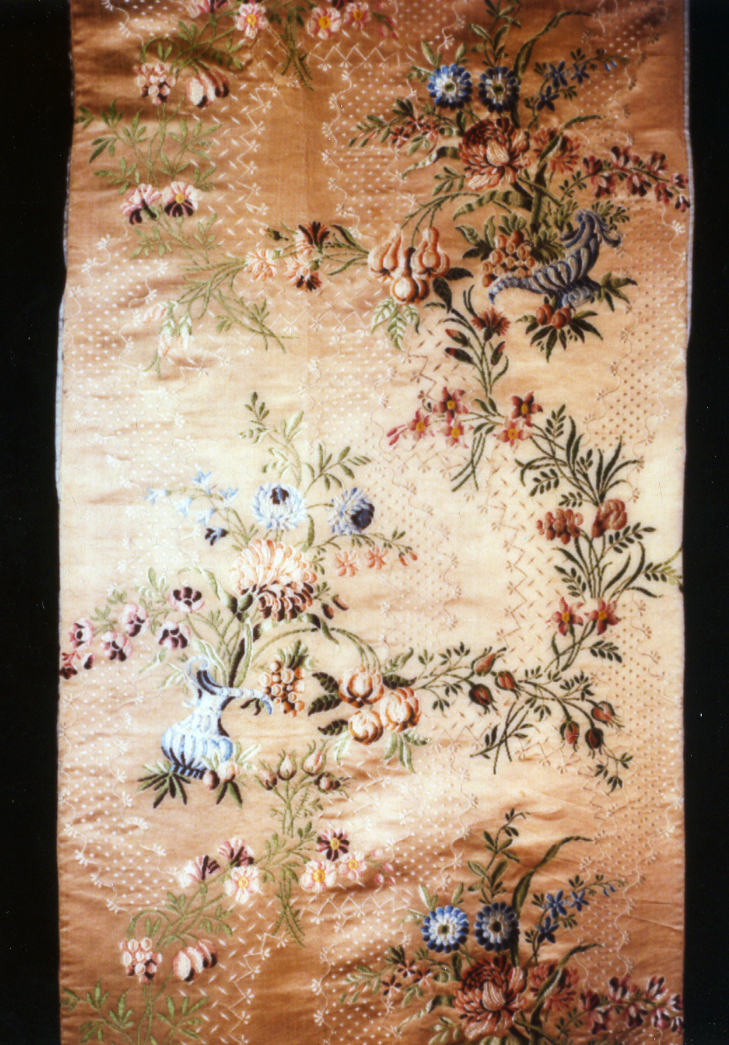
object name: Textile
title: Panel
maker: England, Spitalfields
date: 1725/75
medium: Silk, satin weave with brocading wefts and self-patterned by ground weft floats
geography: England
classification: textile; weaving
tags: flowers, foliage